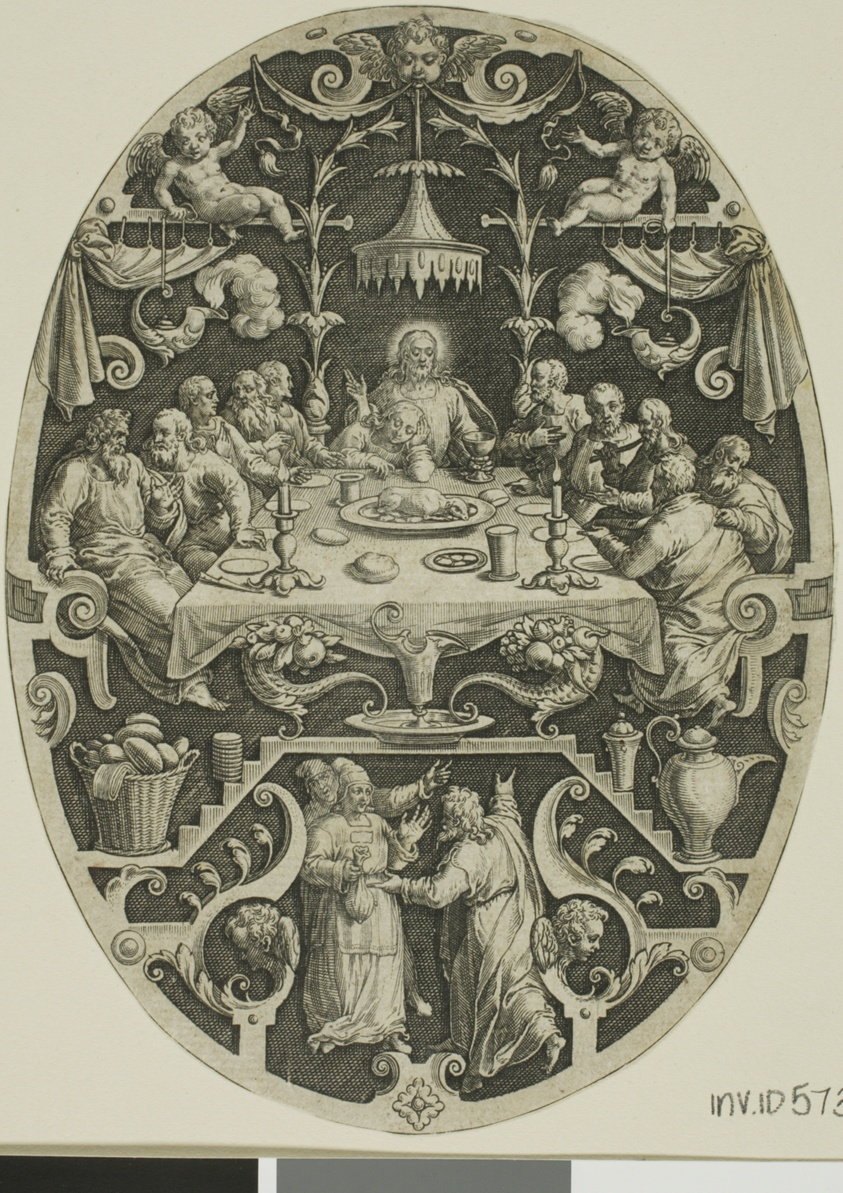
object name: Print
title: Last Supper, from Passion of Christ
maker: Jan Sadeler, the Elder (Flemish, 1550-1600); after Marcus Gheeraerts, the Elder (Flemish, c. 1520-c. 1590)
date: 1575/1600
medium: Engraving in black on ivory laid paper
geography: Flanders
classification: engraving; print; prints and drawing